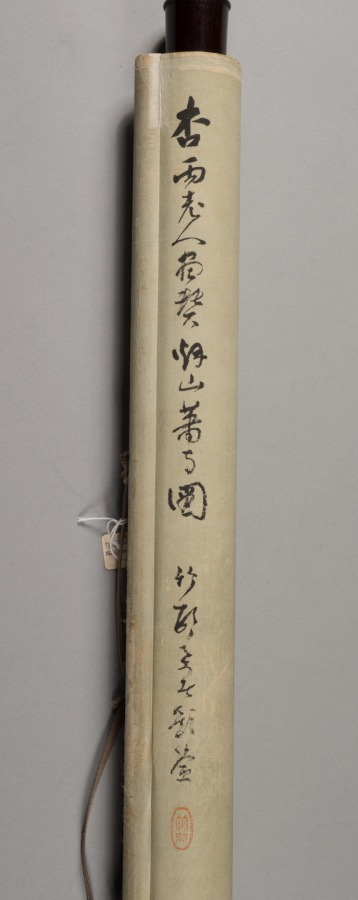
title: Sunset over Autumn Mountains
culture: Japan, Edo period (1615–1868)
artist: Hoashi Kyōu (Japanese, 1810–1884)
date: 1869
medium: hanging scroll; ink and light color on silk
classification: Painting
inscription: translation of poem [by Nora Liu]: The way was forgotten while enjoying the conversation and colors of Autumn, The road entered among the red trees and the white clouds, The trace of a path led to the lonely temple where the monks received enlightenment, The sound of chimes echo remotely in the mountains where the sunset falls. In the year 1869, Kyou